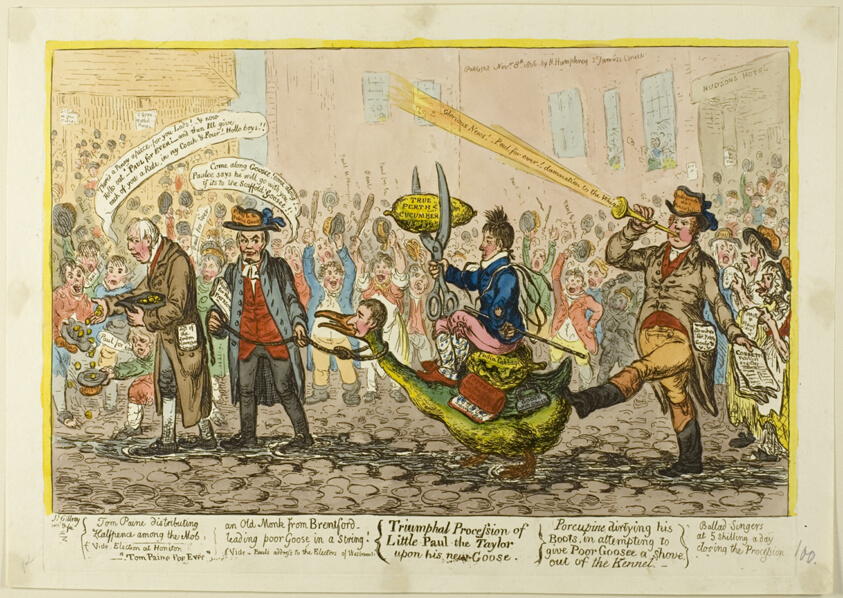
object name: Print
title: Triumphal Procession of Little-Paul-The Taylor Upon his New Goose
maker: James Gillray (English, 1756-1815); published by Hannah Humphrey (English, c. 1745-1818)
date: published November 8, 1806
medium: Hand-colored etching on paper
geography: England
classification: etching; print; prints and drawing